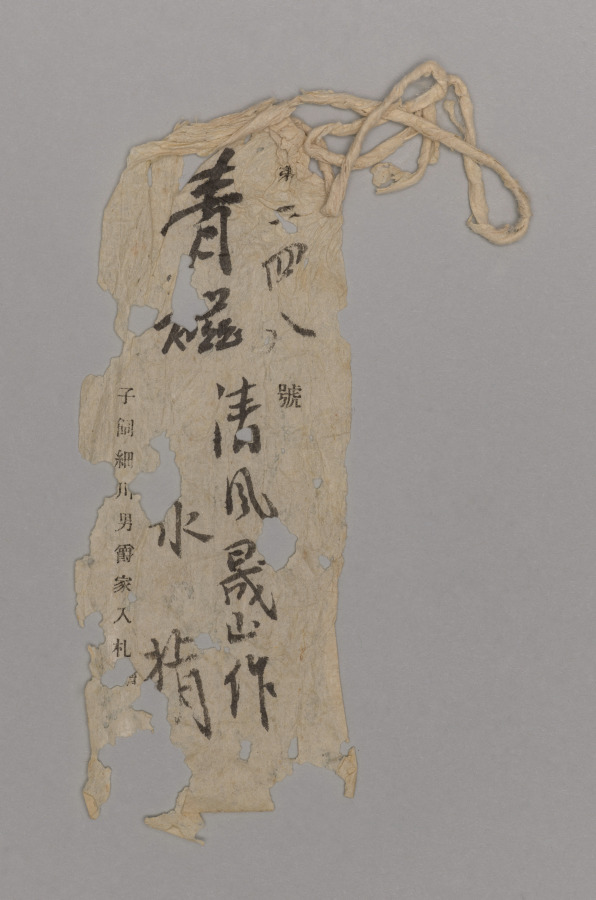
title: Water Container with Peonies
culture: Japan, Meiji period (1868–1912)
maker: Seifū Yohei III (Japanese, 1851–1914)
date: 1900–1914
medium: Porcelain with molded and carved design, green glaze, and black lacquered lid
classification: Ceramic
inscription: 清風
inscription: 帝室技芸員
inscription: 清風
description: This ceramic is an especially accomplished example of Yohei III’s combination of an allover translucent colored glaze with molded and carved designs. It features the peony as its primary motif. The water container, or mizusashi, has a green glaze, and its design takes into consideration the rounded shape and the seated position of the host and guests. It begins low on the body with a flower just beginning to open and continues with another flower a bit higher up, with its petals fully extended and beginning to open outward. It finishes with a flower in full bloom, petals and leaves unfurled and spread outward from the center, now occupying almost the entire surface. The water container once belonged to the Hosokawa family, whose go-between corresponded with Yohei IV about the piece. Yohei IV thanked them for their payment and requested that despite his father’s death in the previous year, they continue to favor the studio with their orders. The letter and its envelope, as well as an auction tag, remain with the object.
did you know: This water container may also serve as a site for cultural reckoning, as when the life cycle of a flower prized in East Asia as a symbol of wealth is displayed across a Japanese chanoyu vessel whose glaze is associated with the seats of power in China and Korea.